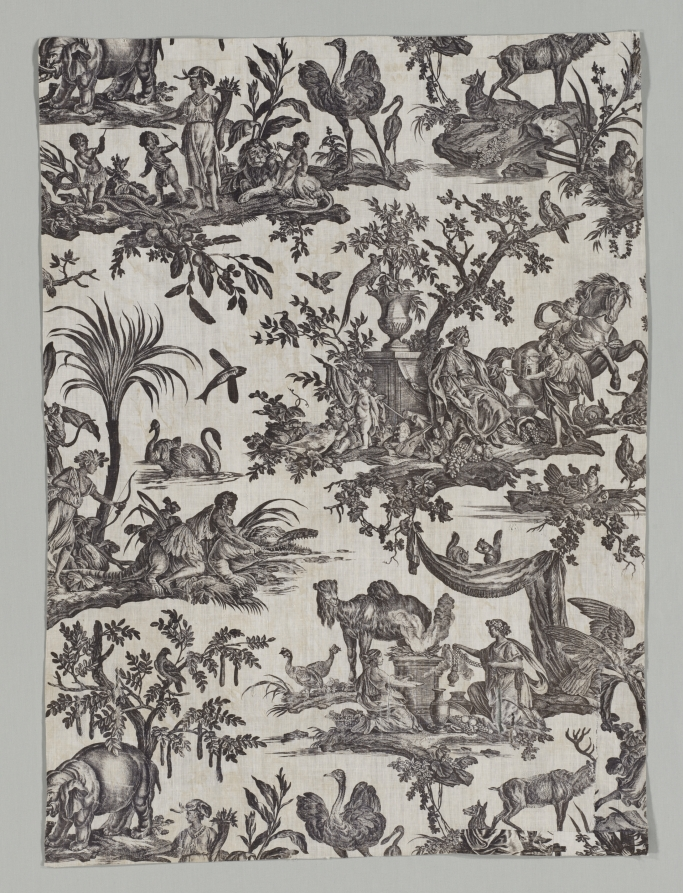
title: The Four Continents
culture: France, 18th century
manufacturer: firm of Christophe Philippe Oberkampf (French, 1738–1815)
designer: Jean-Baptiste Marie Hüet (French, 1745–1811)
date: 1790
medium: Cotton: copperplate printed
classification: Textile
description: Inspired by printed cottons from India, European manufacturers began printing textiles from copper plates in the 1750s. Originating in Ireland, the technique quickly spread to France where it flourished. Here, Jean-Baptiste Marie Huet I depicted female personifications of the four continents alongside their native flora and fauna. Although the artist based the plants and animals on real specimens observed at the Royal Botanical Gardens, he derived the personifications from racist stereotypes that imagined Europe as culturally superior: while Europe sits enthroned with symbols of the arts and knowledge at her feet, Africa wears an elephant headdress, America hunts an alligator, and Asia prays to a false god.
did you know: Marie-Antoinette visited the textile factory where this design was made.